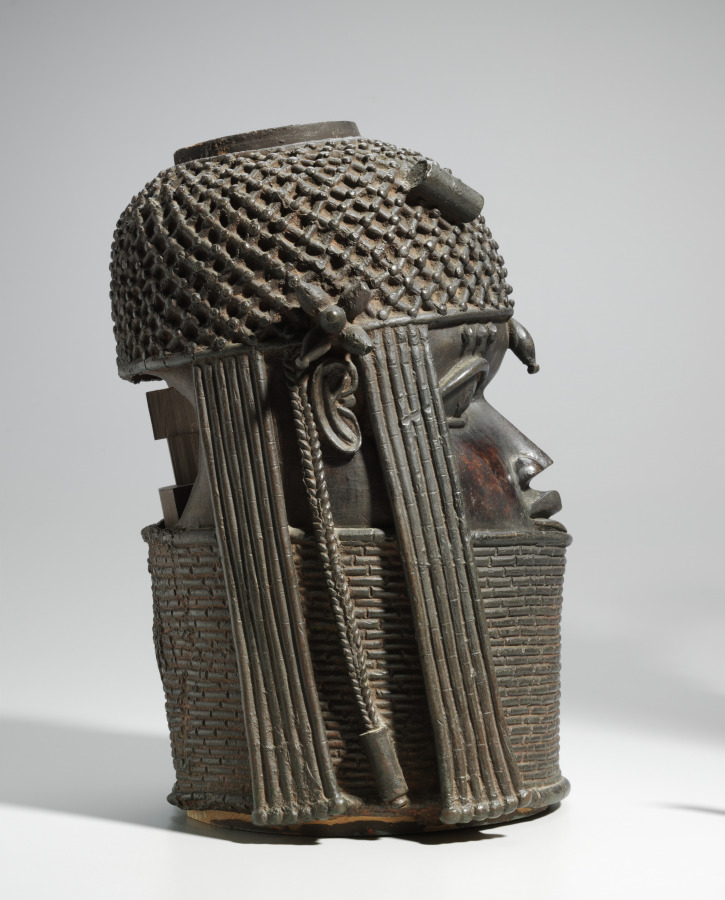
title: Ancestral Commemorative Head (uhunmwun-elao)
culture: Nigeria, Benin Kingdom, Ẹdo peoples, members of the Igun Eronmwon (royal brasscasters) guild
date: possibly mid-1500s or early 1600s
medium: Copper alloy and iron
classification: Sculpture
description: Brass heads are among many objects a new Ọba commissions when dedicating a shrine to their predecessor. This head of an Ọba wears layered necklaces of royal coral beads. Tubular beads adorn both the netted cap and slender braids alongside his temples. While representing an individual, his facial features and calm expression are idealized. The thickly cast head once supported a tusk. Immune to corrosion, brass symbolizes royal permanence. A personal religious object, this head sat on an ancestral altar in the Ọba’s palace. Like many works taken from Benin altars, this contrasts with its present-day public display in an American museum.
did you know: The obas (kings) of the Benin Kingdom still wear coral headpieces and jewelry like this sculpted head depicts.